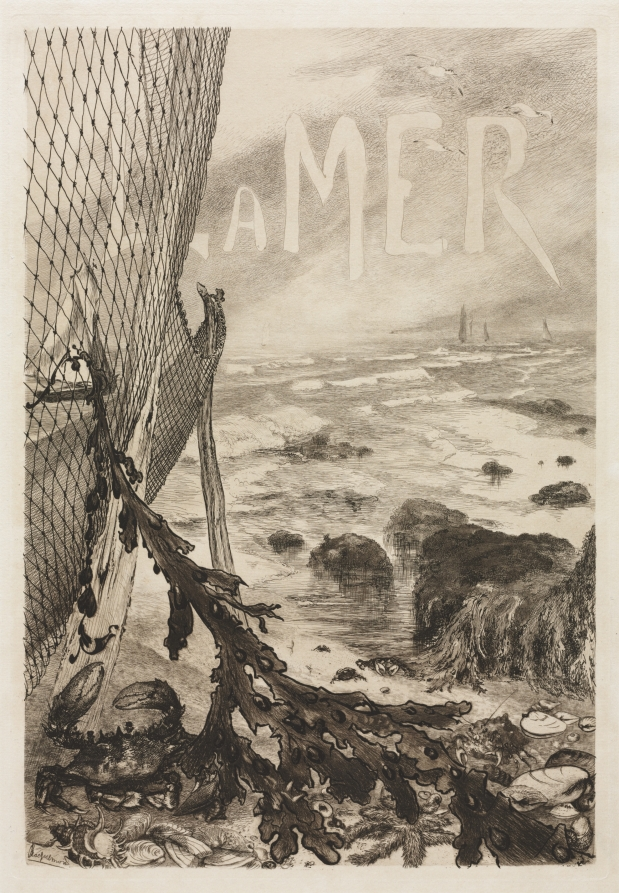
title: The Sea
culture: France, early 20th century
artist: Félix Bracquemond (French, 1833–1914)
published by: Art et Décoration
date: 1905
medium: etching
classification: Print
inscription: signed in plate, lower left: Bracquemond